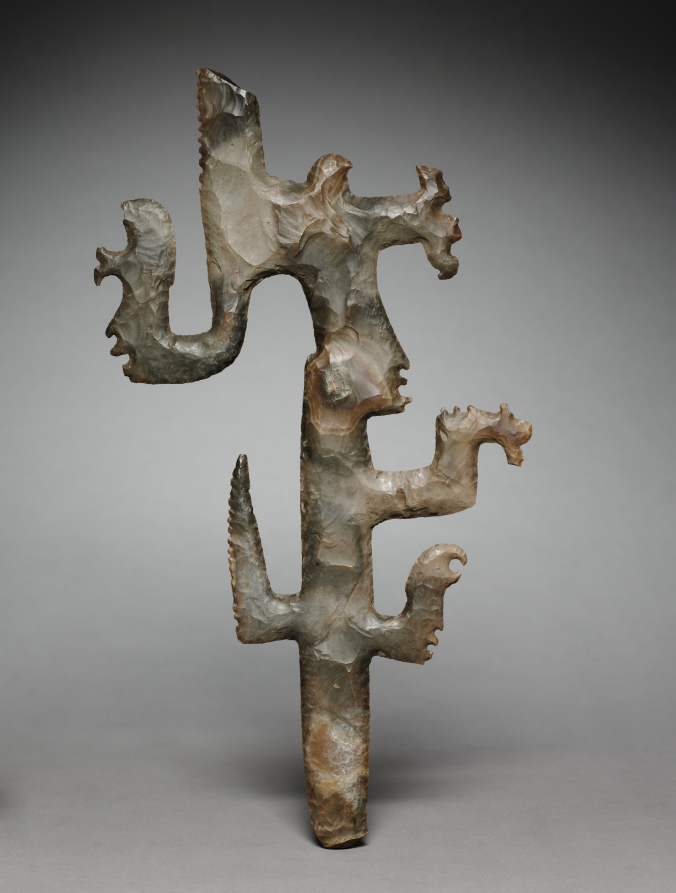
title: Eccentric Flint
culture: Guatemala, Quirigua, Maya style (250-900)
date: 600–900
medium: chipped flint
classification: Stone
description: Named for their unusual shapes, eccentric flints often have intricately silhouetted figures like this. At the forehead of the main profile face is a smoking torch, the insignia of a deity closely linked to rulers and known today as K’awil. Smaller faces appear on three protrusions. Some flints may have served as scepters; they also were buried as offerings beneath buildings and sculptures.